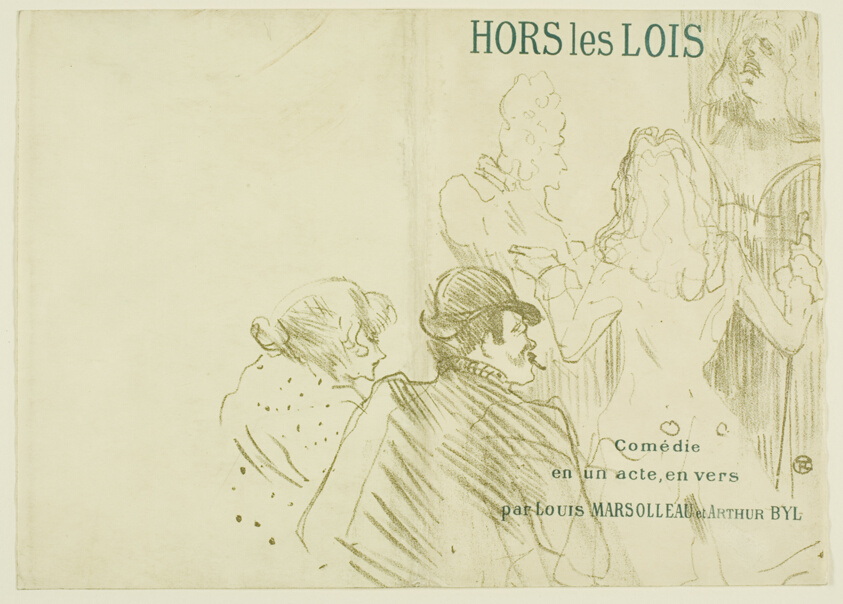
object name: Print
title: Homage to Molière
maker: Henri de Toulouse-Lautrec (French, 1864-1901)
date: 1897, published 1898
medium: Color lithograph on cream wove paper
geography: France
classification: lithograph; print; prints and drawing